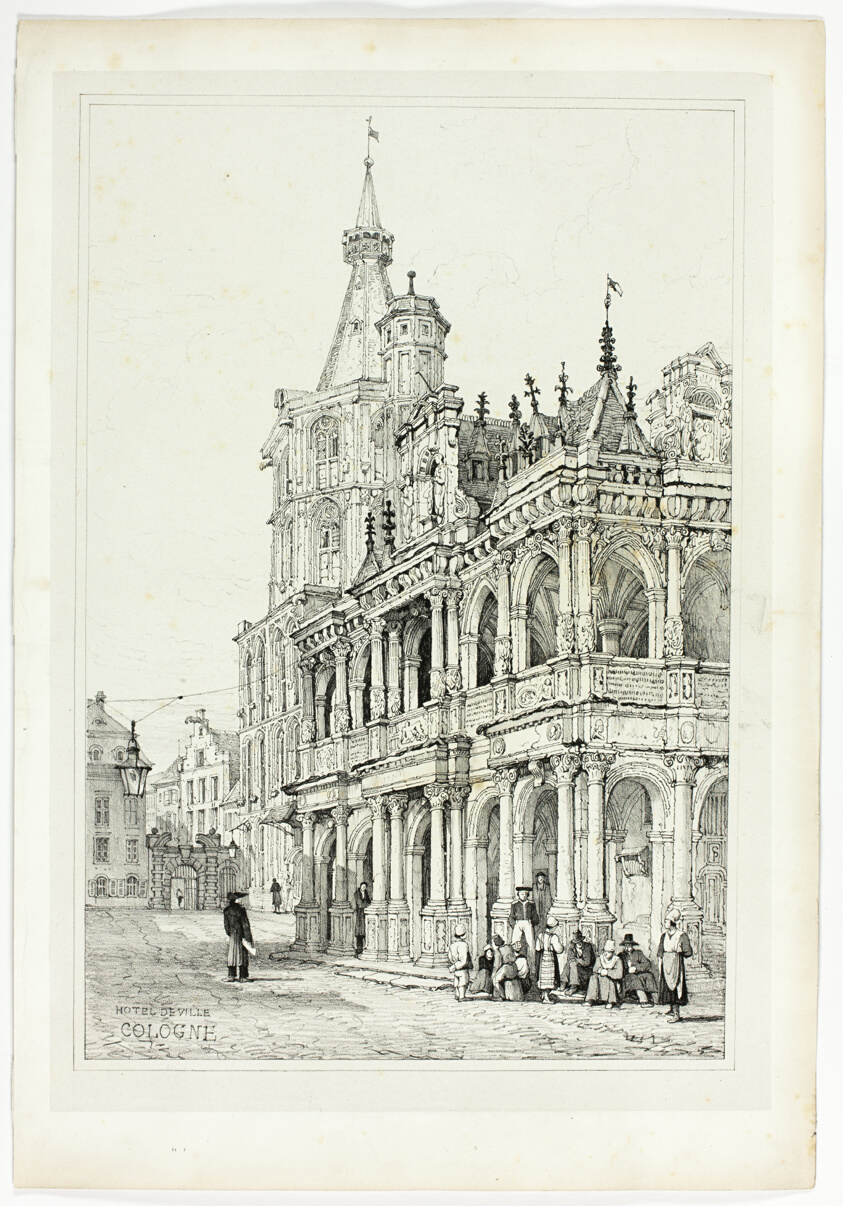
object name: Print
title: Hotel de Ville, Cologne, from Facsimiles of Sketches made in Flanders and Germany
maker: Samuel Prout (English, 1783-1852); printed by Charles Joseph Hullmandel (English, 1789-1850)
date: 1833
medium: Lithograph in black on grayish-ivory chine, laid down on ivory wove paper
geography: England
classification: lithograph; print; prints and drawing